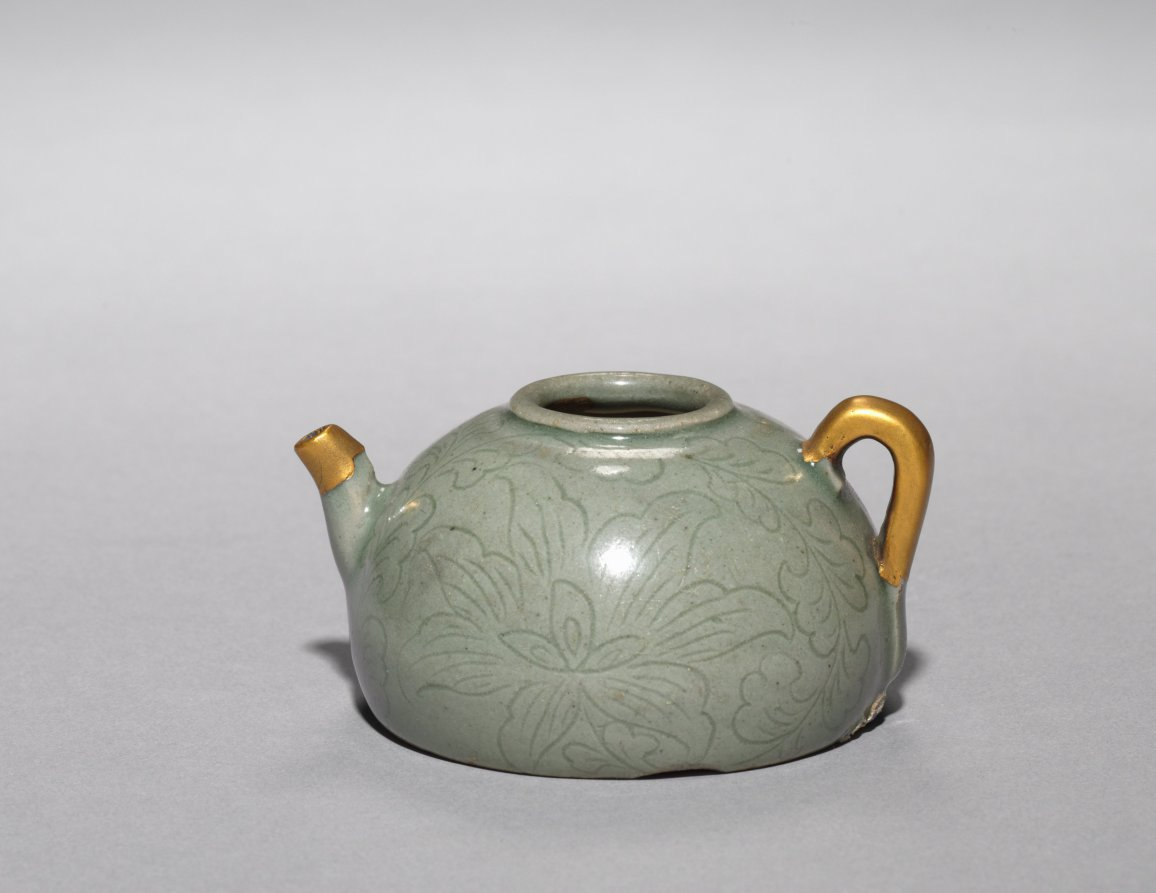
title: Wine Ewer with Incised Scroll Design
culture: Korea, Goryeo dynasty (918–1392)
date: 1100s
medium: celadon with incised and carved design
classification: Ceramic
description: Many celadon ceramics, such as these two miniature pots, have been repaired with gold lacquer. Termed kintsugi (literally meaning “gold joinery”) in Japanese, this restoration method highlights broken parts with glittering gold mixed with lacquer. Initiated in 15th-century Japan, the technique follows a popular aesthetic concept called wabi-sabi, which finds beauty in imperfect things. Goryeo celadons were considered rare treasures among early 20th-century Japanese collectors; thus, their broken condition is brilliantly highlighted in gold lacquer, as seen here in the repaired spouts, handle, and lid.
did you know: Termed kintsugi (literally meaning “gold joinery”) in Japanese, this method of repairing broken parts with glittering gold mixed with lacquer was extensively used for ceramic works in the Goryeo period, such as this one.